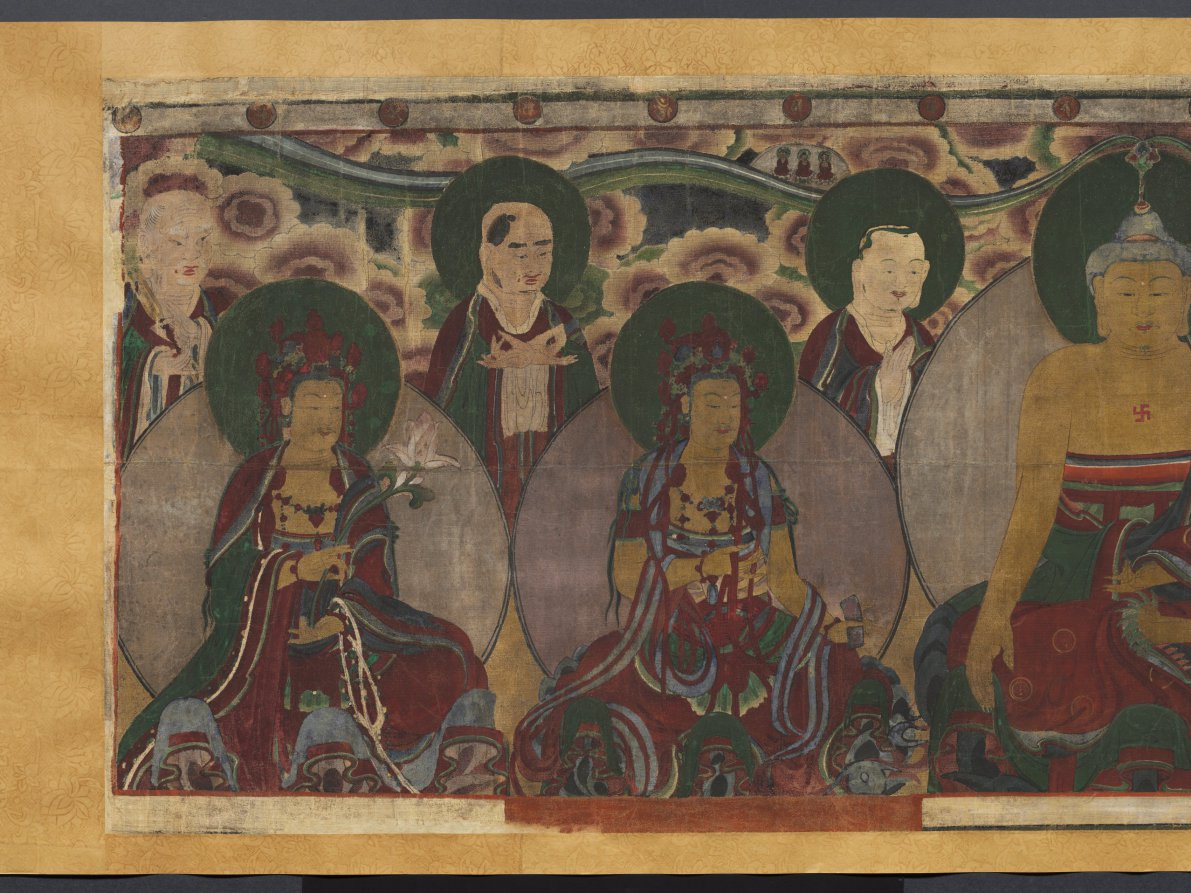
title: Assembly of Buddhist Deities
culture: Korea, Joseon dynasty (1392–1910)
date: 1846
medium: handscroll; ink and color on silk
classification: Painting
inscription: Inscription dated 1846.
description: The central deity in this Buddhist painting is Sākyamuni Buddha, given that he is displaying the earth-touching hand gesture. He is surrounded by several bodhisattvas and disciples. The inscription below, even though partly erased, tells us that the painting was created in 1846 and was hung in the monks’ residential hall.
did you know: The inscription below, even though partly erased, tells us that the painting was hung in the monks’ residential hall.